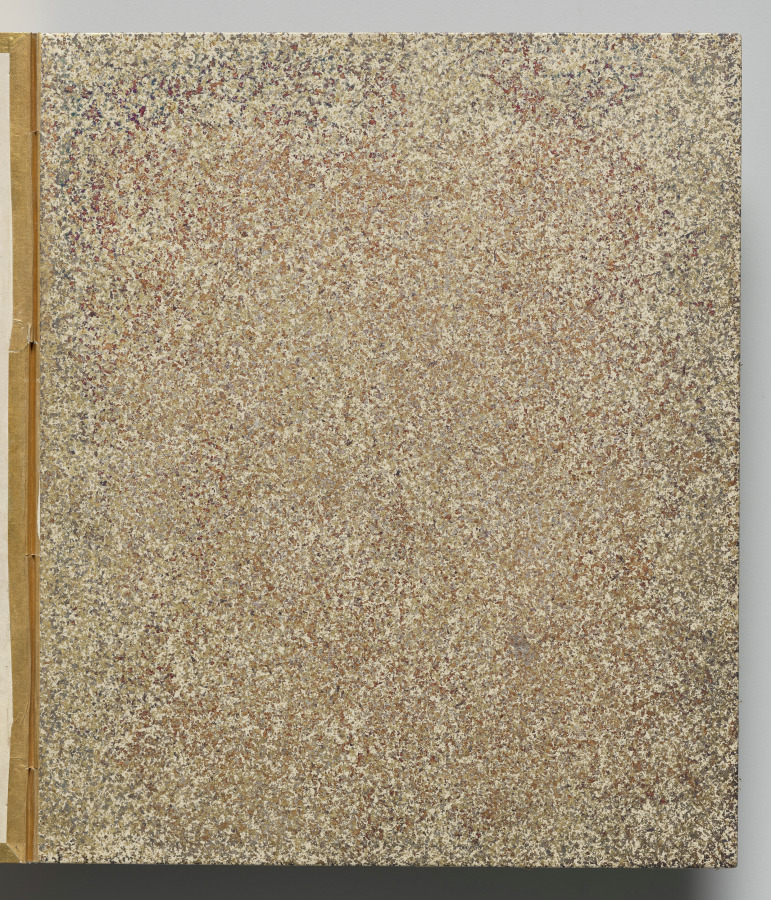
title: Album of Illustrations for the Tale of Genji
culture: Japan, Edo period (1615–1868)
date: 1600s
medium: Double-sided accordion-style album of 17 leaves; ink, light color, and gold on paper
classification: Bound Volume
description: This album contains illustrations for the classic literary work the Tale of Genji, authored in the 1000s by Murasaki Shikibu, an aristocrat of the Heian period (794–1185) court. The scenes are painted in the “white drawing” (hakubyō) mode, in which a fine ink line is used to depict figures and spaces with great subtlety, punctuated only occasionally by traces of red pigment for a character’s lips, a detail of a garment, or a decorative element. These two scenes illustrate episodes from the chapters “Thin Veil of Cloud” (Usugumo) and “Barrier Gate” (Sekiya).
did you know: The illustrations are identified by chapter title in cartouches to the upper right of the paintings.